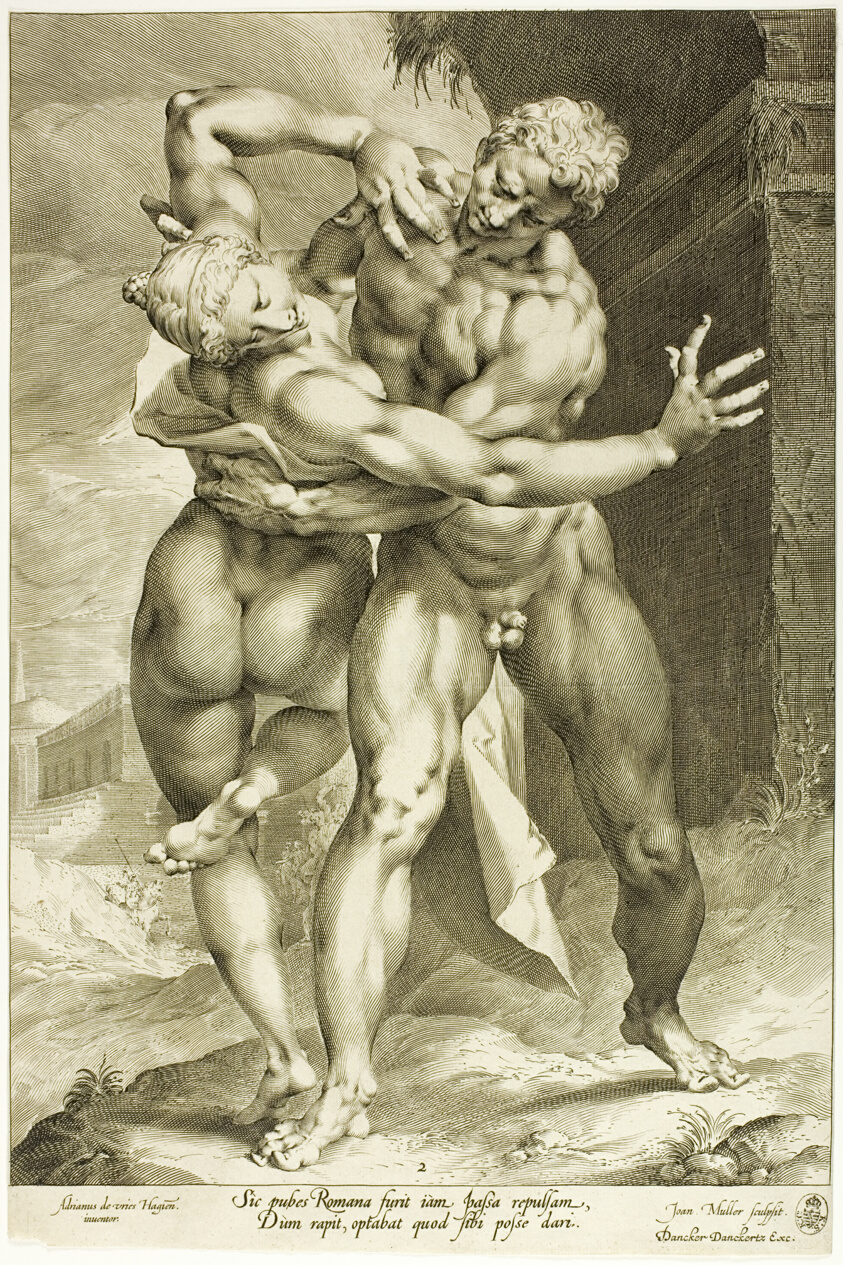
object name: Print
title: The Rape of a Sabine Woman, Frontal View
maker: Jan Harmensz Muller (Dutch, 1571-1628); after Adriaen de Vries (Dutch, c. 1545-1626)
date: c. 1598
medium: Engraving on paper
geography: Netherlands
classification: engraving; print; prints and drawing